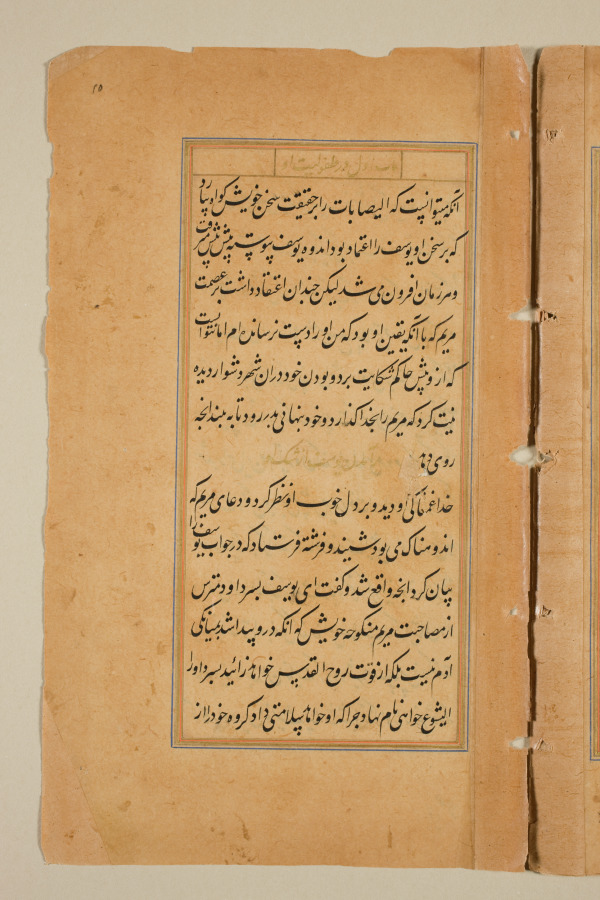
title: Text page from a Mirror of Holiness (Mir’at al-quds) of Father Jerome Xavier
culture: Mughal India, Allahabad, made for Prince Salim (1569–1627)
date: 1602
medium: Ink and gold on paper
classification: Manuscript